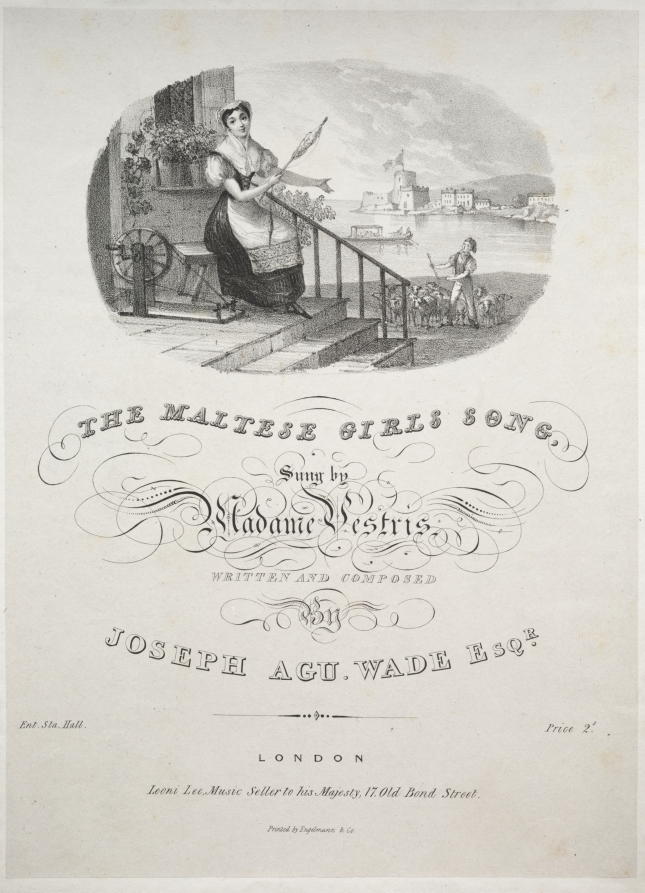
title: The Maltese Girls Song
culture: England, 19th century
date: 1800s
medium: lithograph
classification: Print